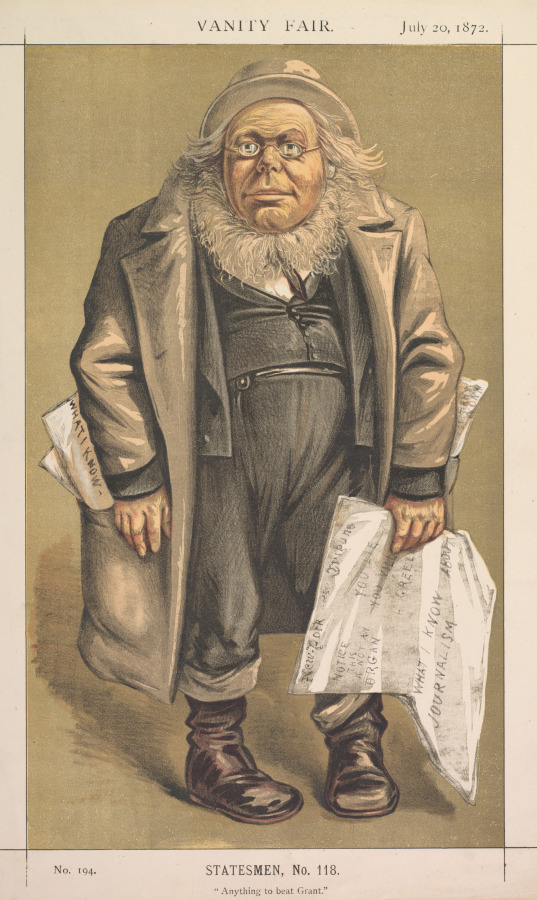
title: Vanity Fair: Statesman, No. 118 "Anything to Beat Grant"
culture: America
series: published in Vanity Fair July 20, 1872; Vanity Fair. (Boston: Frame Central, 1992.) p. 4, 20 July, 1872, S. No. 118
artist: Thomas Nast (American, 1840–1902)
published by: Vincent Brooks Day & Son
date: 1872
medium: color lithograph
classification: Print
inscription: on mat: Davidson Galleries, Seattle, 11/01; on mat: original by Thomas Nast in National Portrait Gallery